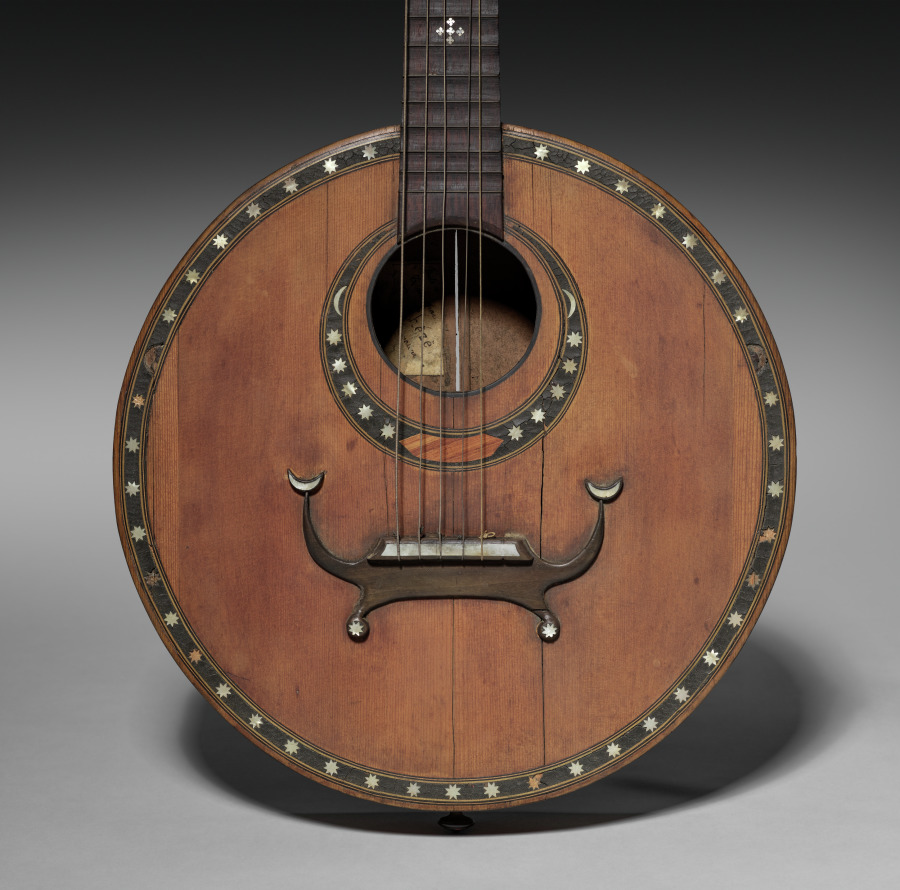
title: Guitar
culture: Italy, 19th century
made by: probably by Fernando Theze (Italian)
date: c. 1860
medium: wood, ebonized wood, mother of pearl inlay, resin, bone?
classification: Musical Instrument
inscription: label inside reads: "Faite a Turin par F. Theze--Amateur."